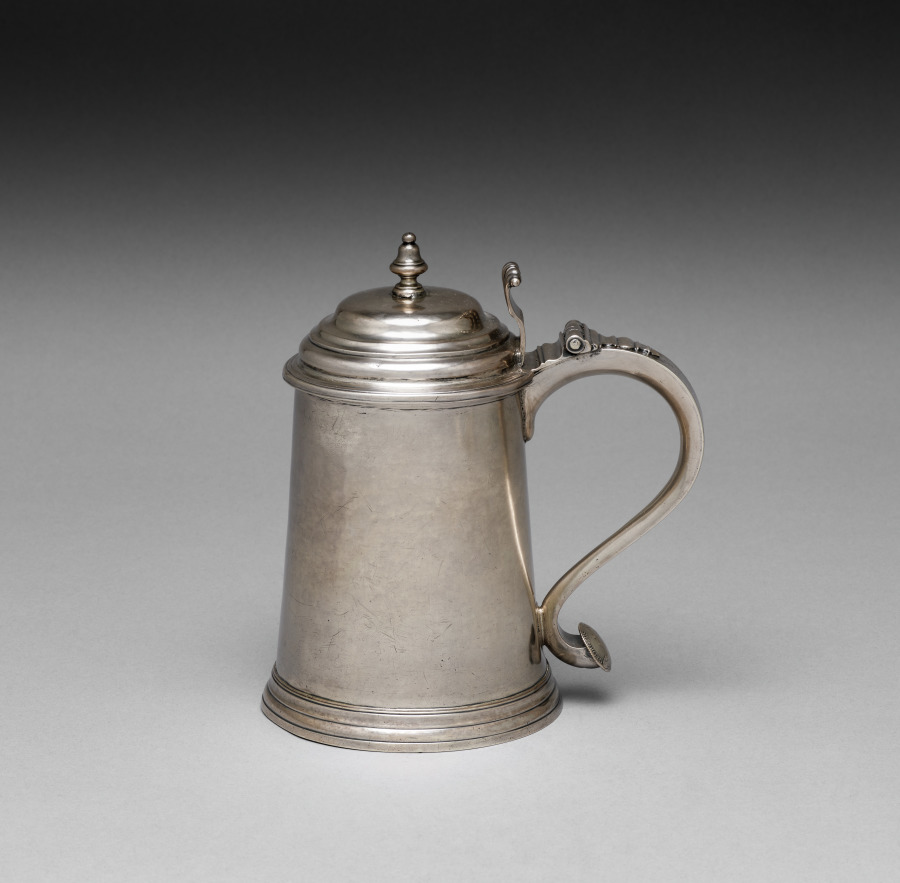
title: Tankard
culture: America, Massachusetts or Rhode Island, 18th century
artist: Jonathan Clarke (American, 1706–1766)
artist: or Joseph Clark (American)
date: c. 1750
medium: silver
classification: Silver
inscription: Engraved on handle: "B" over "I*E".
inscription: Stamped on handle: "Georgius II Deui Gratia".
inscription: Stamped underside: "I. Clark".